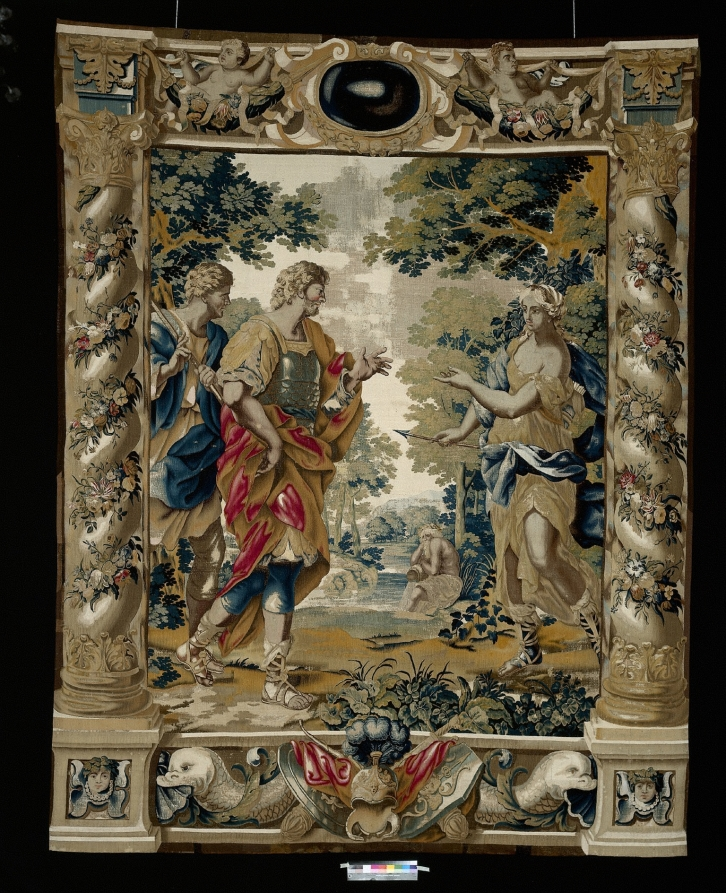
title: Venus tells Aeneas and his friend Achates to go to Carthage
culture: Belgium, 17th century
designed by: Giovanni Francesco Romanelli (Italian, 1610–1662)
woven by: Michael Wauters (Flemish, 1679)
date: 1679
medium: tapestry weave: silk and wool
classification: Tapestry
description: Venus, seen here dressed as a huntress, advises her son, Aeneas, to visit Dido, queen of Carthage. Venus wants her son to stop wandering and marry the queen.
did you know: This tapestry is one from a series of eight that depicts the tragic love story of Dido and Aeneas which were gifted to the museum for display in the armor court.